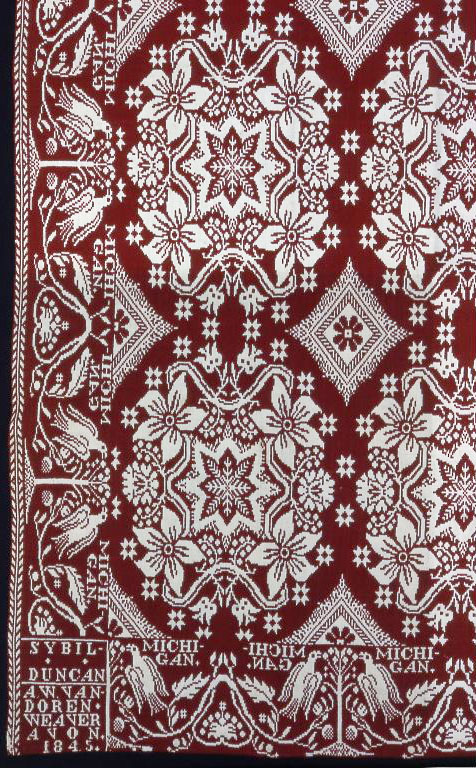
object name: Textile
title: Coverlet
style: 19th century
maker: Abram William Van Doren (American, 1808–1884); United States, Michigan, Oakland County, Avon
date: 1845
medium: Cotton and wool, plain weave double cloth; woven on loom with Jacquard attachment; two loom widths joined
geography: Michigan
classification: weaving - coverlet; coverlet; weaving; textile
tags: medallions, star, trees, fruit, foliage, birds, vines, lilies, flowers, coverlet